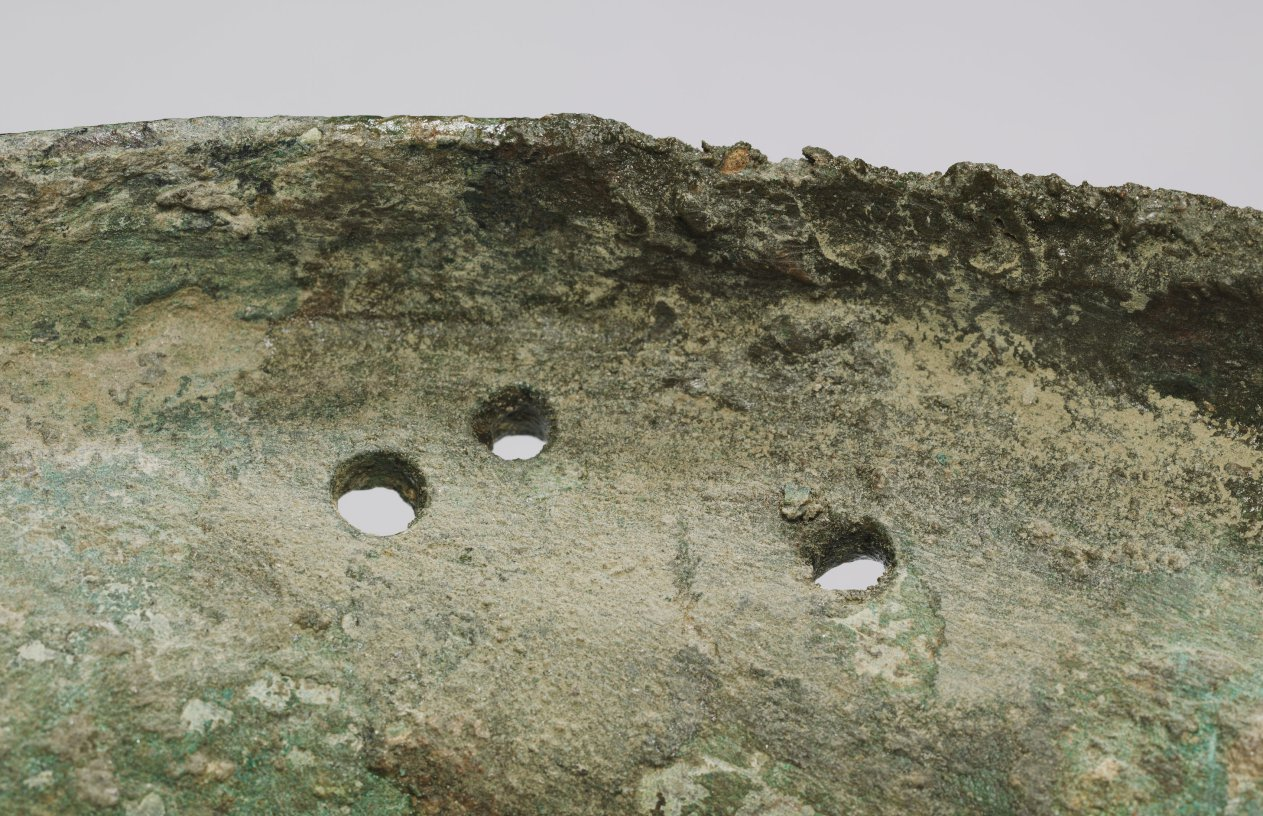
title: Bronze Volute Krater Base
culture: Greece, Laconia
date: late 600s BCE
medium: bronze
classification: Metalwork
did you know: This object supported a large vessel used for mixing wine with water called a krater.